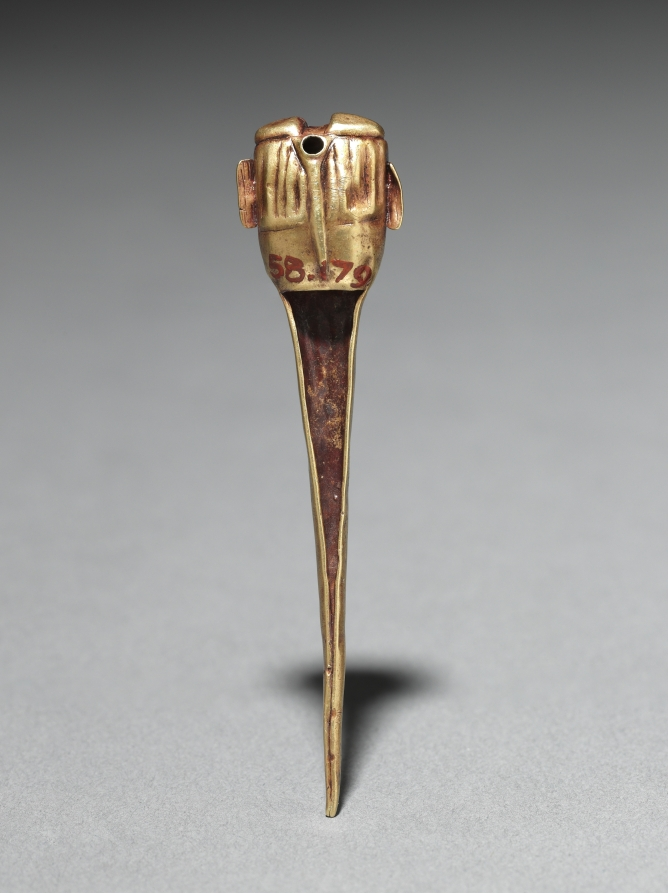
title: Pin Ornament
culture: Peru, North Highlands, Chavín de Huantar(?), Chavín style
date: c. 500–200 BCE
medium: hammered and cut gold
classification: Metalwork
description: There seems to be a link between Chavín religion and appearance of the Andes’ first large precious-metal objects, made using revolutionary new metallurgical processes. Chavín may have developed these technical innovations to express the inexpressible, the "wholly other" nature of its religion. In many areas, elite men and women wore the ornaments as emblems of their ties to this religion, and eventually were buried with them. These 16 objects, along with three others not in the museum’s collection, are said to have come as a group from Chavín itself.